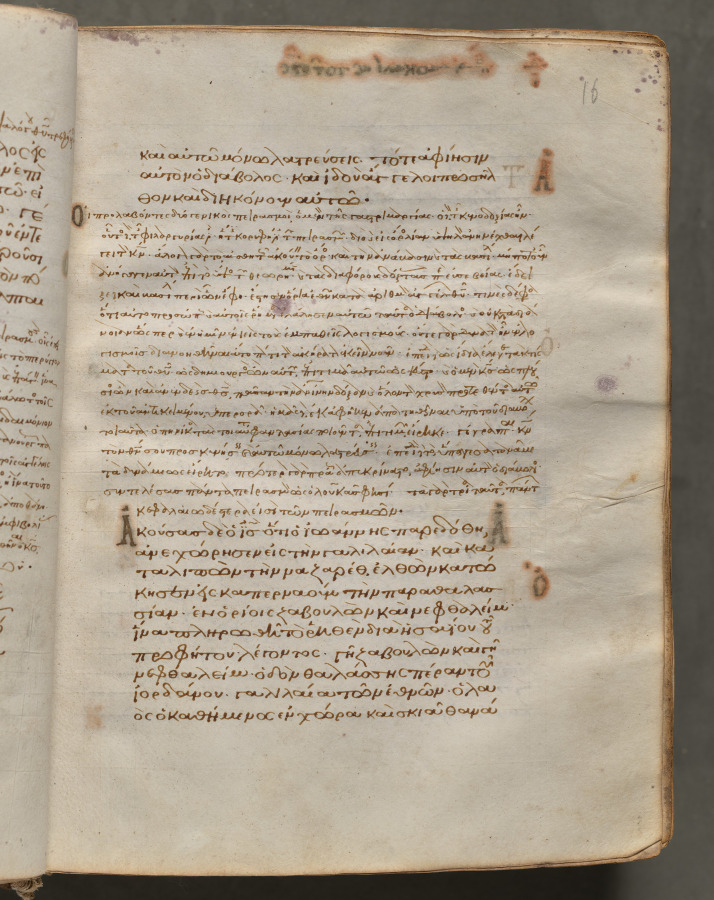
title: Text, folio 16 (recto), from a Gospel Book with Commentaries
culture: Byzantium, Constantinople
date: c. 1000–1100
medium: ink, tempera, and gold on vellum; leather binding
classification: Bound Volume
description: Each of the four gospels in this book opens on a page with brilliantly illuminated borders depicting the author of the text as well as birds-principally peacocks, symbols of the immortality of the soul-and fountains, representing the fountain of life and the salvation of the soul. This volume consists of 428 leaves with texts in Greek. Its level of sophistication suggests that it was probably written and decorated in a monastery in Constantinople.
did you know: Gospel Books were carried in procession through Byzantine churches.